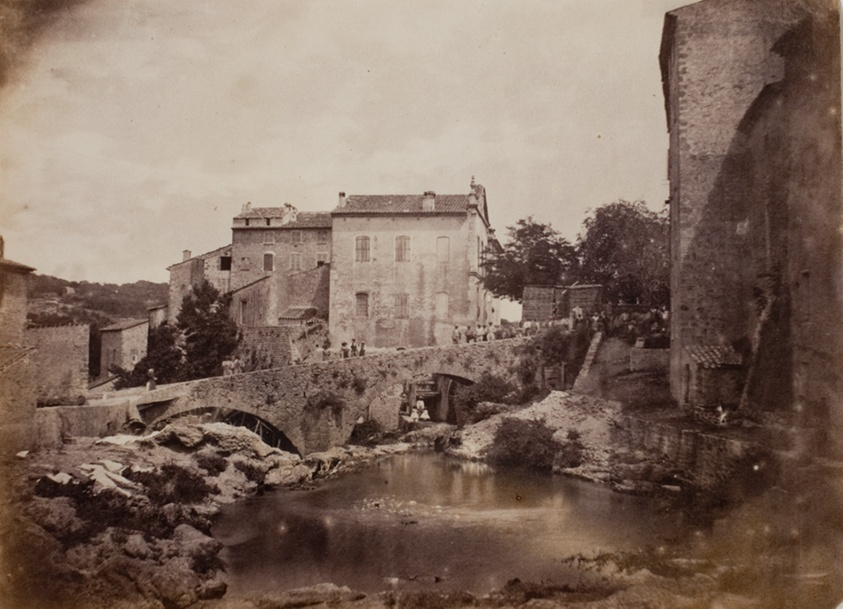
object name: Photograph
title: Grasse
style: 19th century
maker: Charles Nègre (French, 1820–1880)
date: 1855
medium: Salted paper print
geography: France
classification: photograph; photography